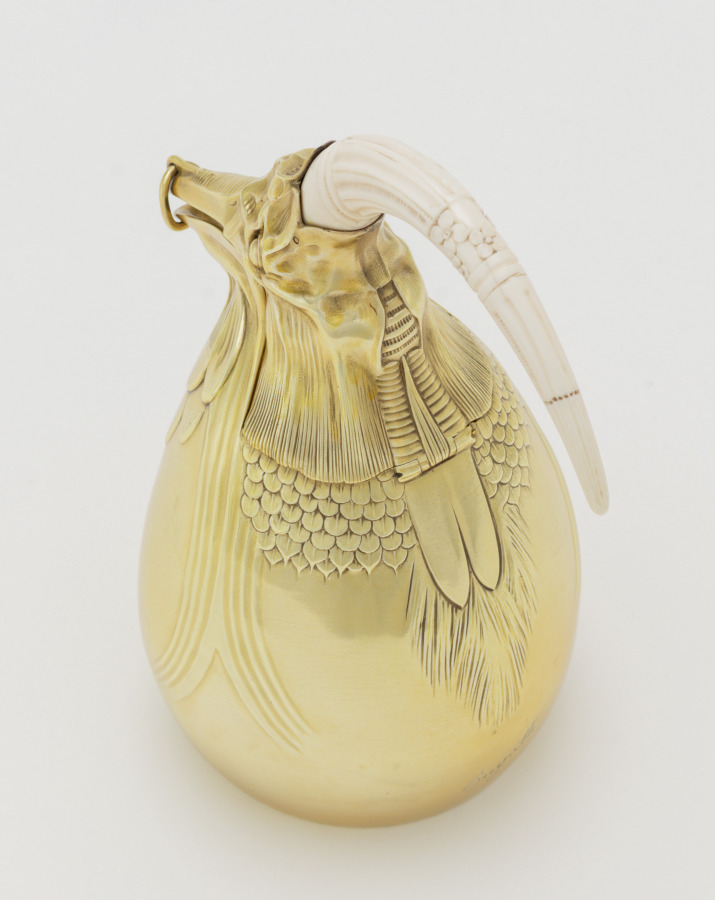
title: Coffee Pot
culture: France, Paris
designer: Carlo Bugatti (Italian, 1856–1940)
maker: Adrien-Aurélien Hebrard (French, 1866–1937)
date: c. 1907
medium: Gilt silver and ivory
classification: Silver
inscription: Made by A. A. Hebrard Firm, Paris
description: This tea and coffee service, salver, and table, together with some now missing cups, were all designed by Carlo Bugatti as an ensemble and presented at the 1902 exposition devoted to decorative arts in Turin, Italy. The set was probably acquired from Bugatti's 1907 exhibition at the Galerie Hébrard in Paris by a wealthy South African widow, Anna Blake, who was living there at the time. Some of the animal and insect motifs suggest mythical beasts or the fossils of prehistoric animals. When Mrs. Blake returned to Cape Town, she took these and other pieces designed by Bugatti with her, and they remained in South Africa throughout her lifetime.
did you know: This coffee pot is part of a larger tea and coffee service designed by Carlo Bugatti.